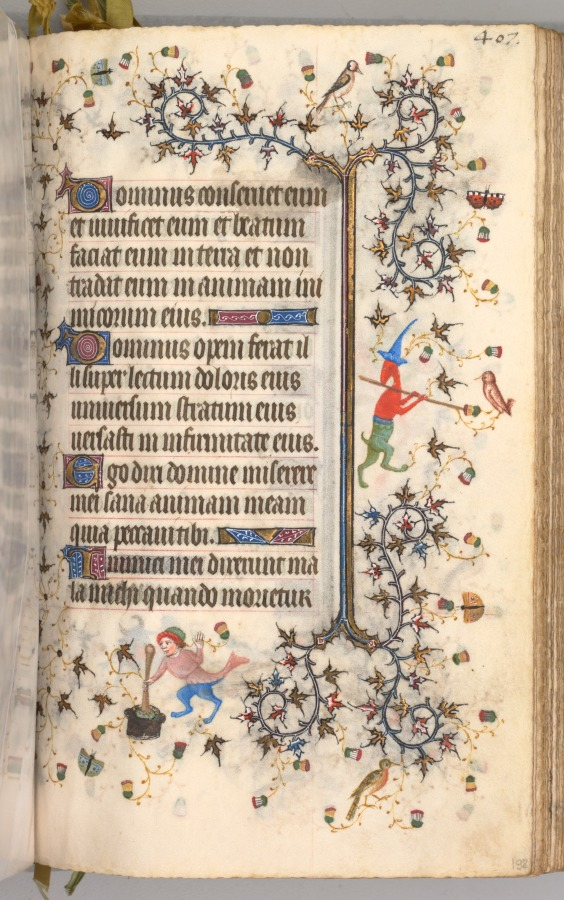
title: Hours of Charles the Noble, King of Navarre (1361-1425): fol. 198r, Text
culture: France, Paris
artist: Master of the Brussels Initials and Associates (French)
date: c. 1405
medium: ink, tempera, and gold on vellum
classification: Bound Volume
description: This precious volume was obviously highly prized by its owner, the French-born King of Navarre, who had his coat of arms painted on no less than twenty folios. Rather than directly commissioning this manuscript from a specific workshop, it seems that Charles the Noble acquired his book of hours -- perhaps ready-made for the luxury market -- while on a trip to Paris in 1404-05. A collaborative effort, six painting styles are evidenced within the pages of this codex, those of two Italians, two Frenchmen, and two Netherlanders. The painter who was responsible for the planning and decoration of the book, and who produced seventeen of the large miniatures, was a Bolognese artist known as the Master of the Brussels Initials. His principal assistant, responsible for most of the borders, was a Florentine who signed his name "Zecho" da Firenze on folio 208 verso.